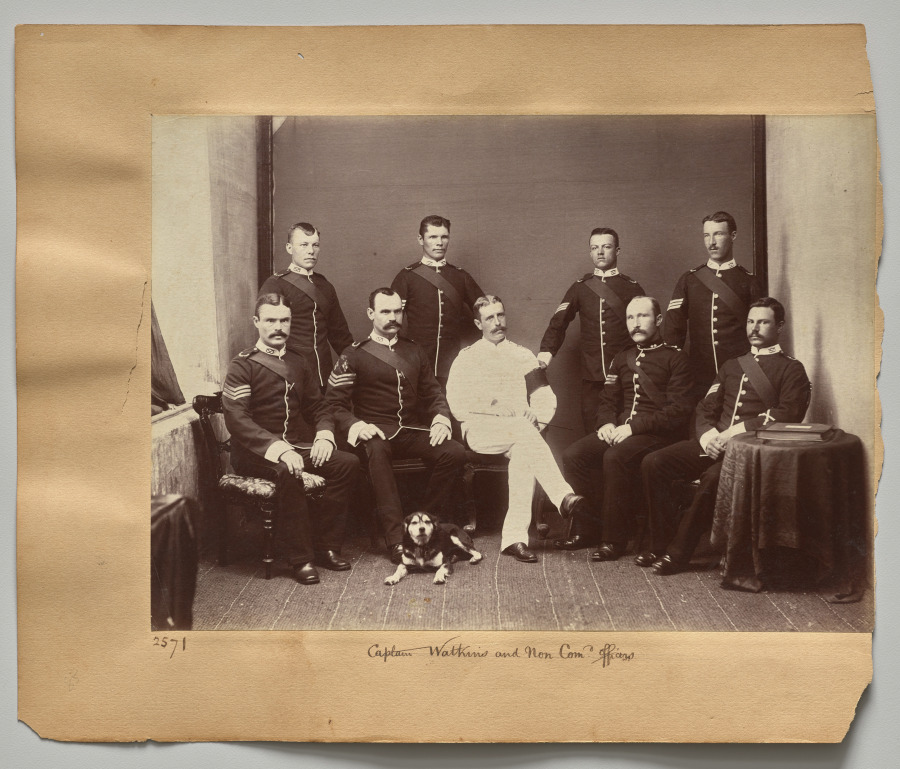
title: Captain Watkins and Non Com. officers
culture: India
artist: Raja Deen Dayal (Indian, 1844–1905)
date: c. 1882–87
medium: albumen print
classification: Photograph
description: These photographs are part of an album, now disassembled, of around 105 photographs taken in India between 1885 and summer 1887 that provide glimpses into the lives of the British colonial elite and royal and upper-class Indians. The museum holds another group of 37 pictures from this album (2016.266), which was probably commissioned by a British civil servant visiting or working in India around 1888 as a personal souvenir of his experiences there.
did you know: Raja Deen Dayal is regarded now, and was considered during his lifetime, to be India’s most important 19th-century photographer.